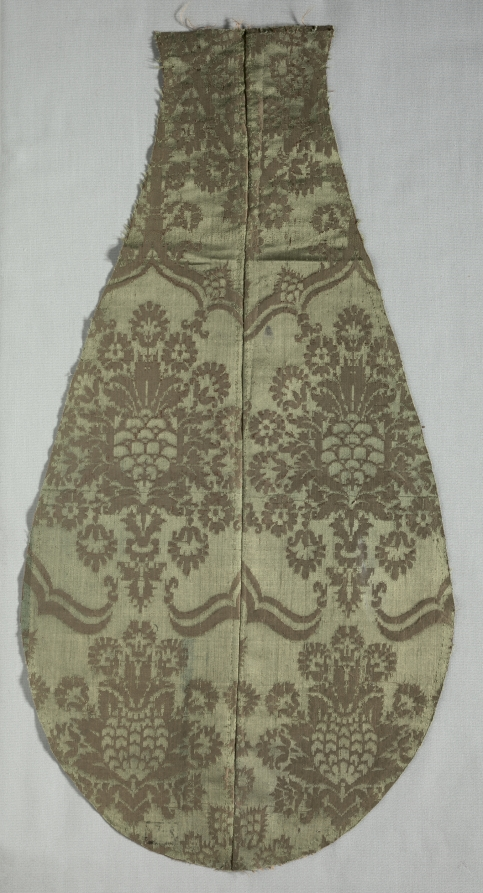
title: Textile Fragment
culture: Italy, 16th century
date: 1500s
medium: damask, silk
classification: Textile